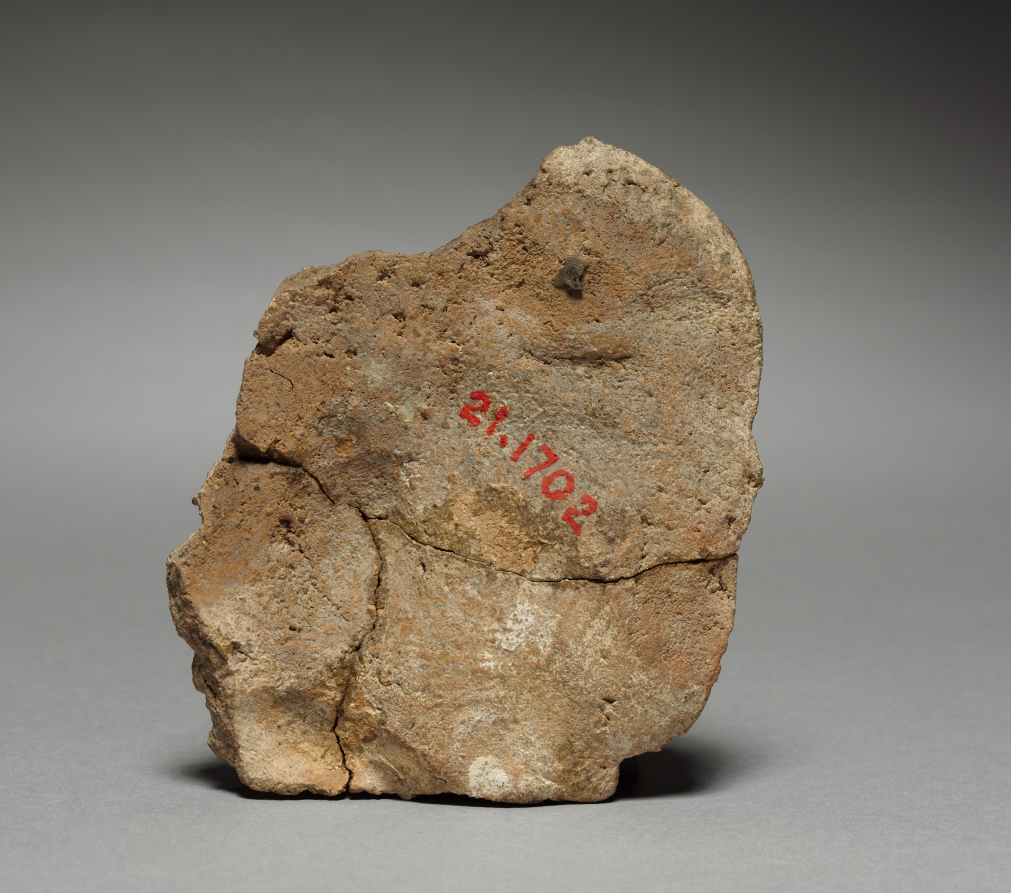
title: Head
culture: Mexico, Teotihuacan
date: 1–750 CE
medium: pottery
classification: Ceramic